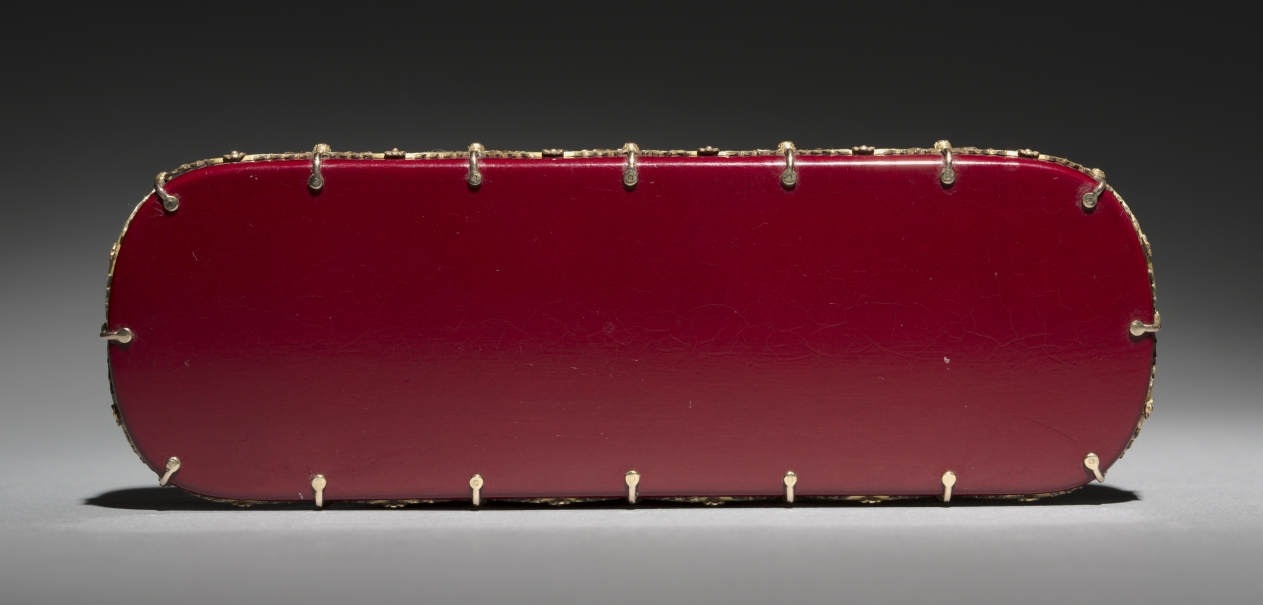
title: Lacquer Box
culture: Russia, St. Petersburg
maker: House of Fabergé (Russian, 1842–1918)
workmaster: Factory N. Lukutin (Russian)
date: c. 1890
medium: lacquer, papier-mâché, gold, diamonds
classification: Miscellaneous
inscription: inscribed (inside cover): Factory N. Lukutine (in Cyrillic script in gold); three double-headed eagles in gold.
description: This lacquer box was created by the Lukutin Factory, which was well known for creating boxes such as this one after Piotr Lukutin took charge of production and expanded the factory to include tea caddies and various desk accessories. This particular box from the Lukutin workshop is remarkable in its detailed gold patterns and diamond inlays that create an intentional contrast with the deep red surface.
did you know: Piotr Lukutin’s workshop employed over 50 skilled painters as well as acted as a school for training apprentices.